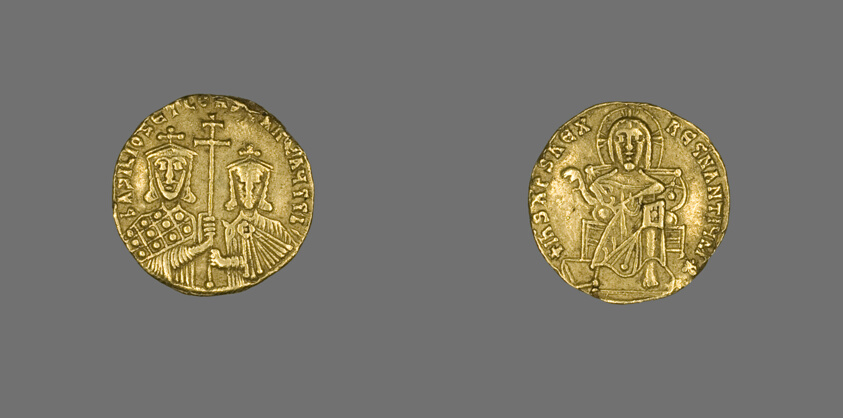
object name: Coin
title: Solidus (Coin) of Basil I with Christ Enthroned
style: byzantine, european, ancient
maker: Byzantine, minted in Constantinople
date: 868–870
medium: Gold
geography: Byzantine Empire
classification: coin; ancient art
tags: goddesses, gods (deities)